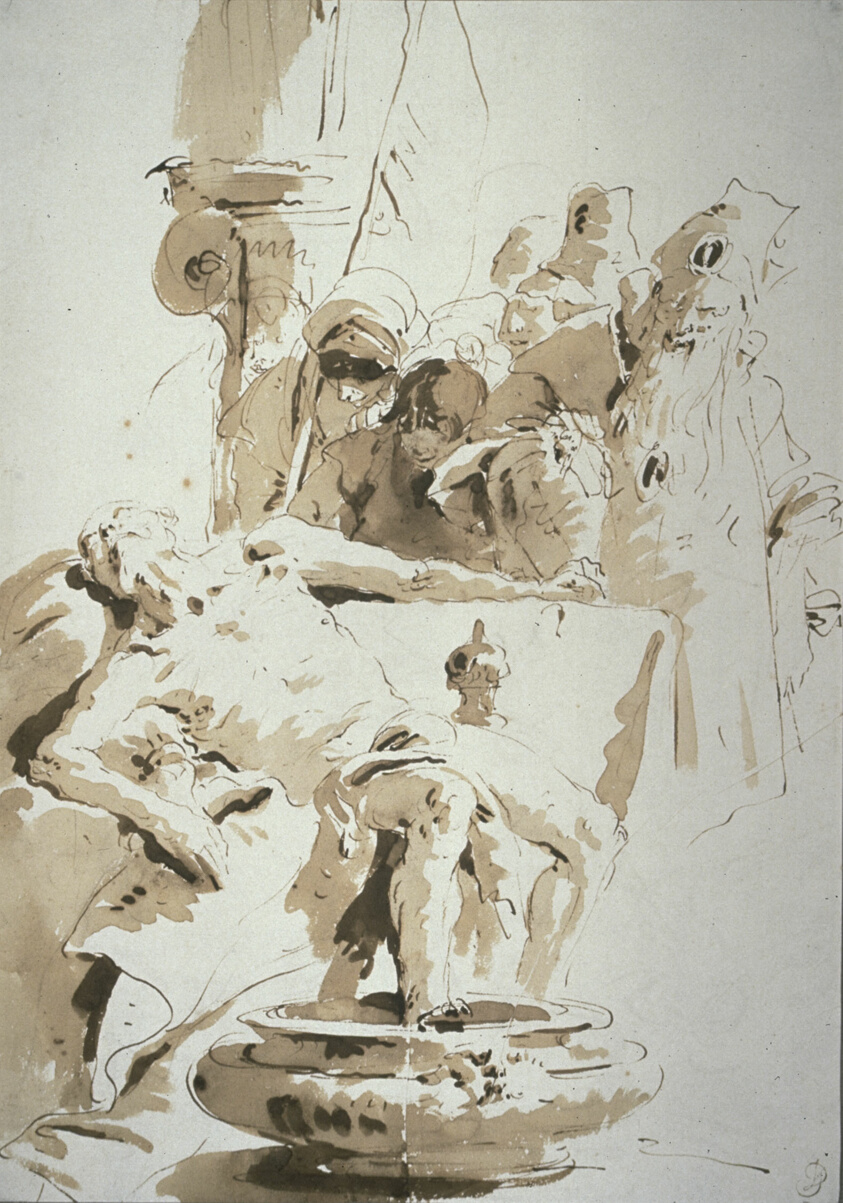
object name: Drawing and Watercolor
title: Fantasy on the Death of Seneca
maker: Giovanni Battista Tiepolo (Italian, 1696–1770)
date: 1735/40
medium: Pen and brown ink with brush and brown wash, over black chalk, on ivory laid paper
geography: Italy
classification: pen and ink drawings; drawings (visual works); prints and drawing